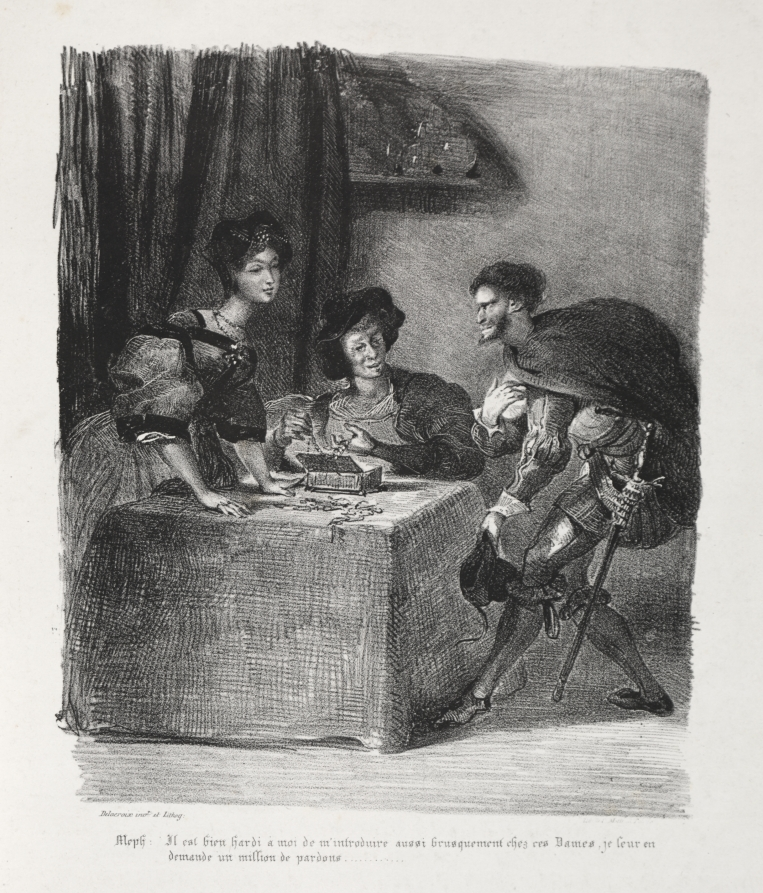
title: Illustrations for Faust: Méphistophelés is at Marthe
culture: France, 19th century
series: Faust: Tragédie de M. de Goethe, translated into French by Albert Stapfer.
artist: Eugène Delacroix (French, 1798–1863)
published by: Chez Ch. Motte, Éditeur, distributed by Chez Sautelet, Libraire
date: 1828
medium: lithograph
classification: Print